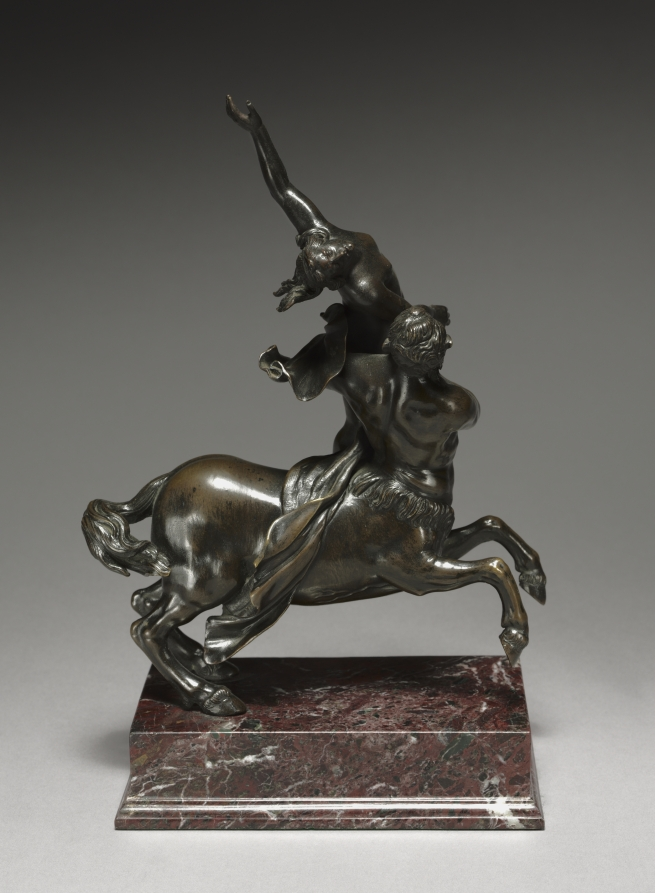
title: Nessus and Deianeira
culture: Italy, 17th century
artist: Francesco Fanelli (Italian, 1661)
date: made in England, probably 1630–40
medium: bronze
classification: Sculpture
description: Fanelli apparently came from Florence and this group clearly indicates that he was familiar with the work of Giambologna, the leading sculptor active in that city around 1600.